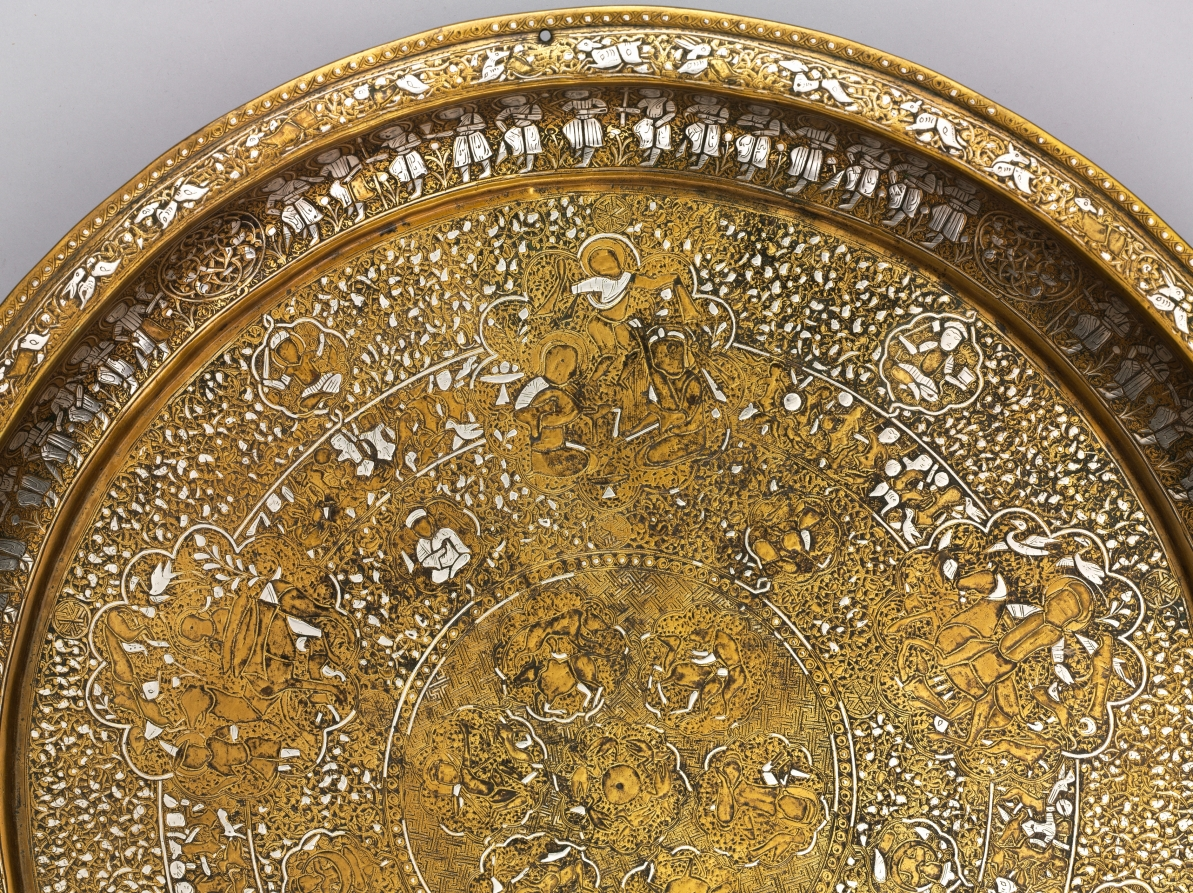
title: Tray Portraying Courtly Pleasures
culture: Syria, Ayyubid period (1171–1260)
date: 1240s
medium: sheet brass inlaid with silver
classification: Metalwork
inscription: The presence of ligatures in the narrow circular bands with interconnected human and animal figures suggests this may be a degenerate form of animated script. It is indecipherable.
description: This tray features images of courtly life interspersed with astronomical symbols. The scenes contained within large multilobed medallions display an enthroned prince with lions at his feet, a banquet, a hunt, dancers, and musicians. Contained within the concentric circles there are also references to solar and lunar motifs, including figures holding sunbursts and lunar crescents. This tray is made of a single sheet of brass and the silver inlay, which is best preserved on the tray’s inner curve, suggests its original brilliance.